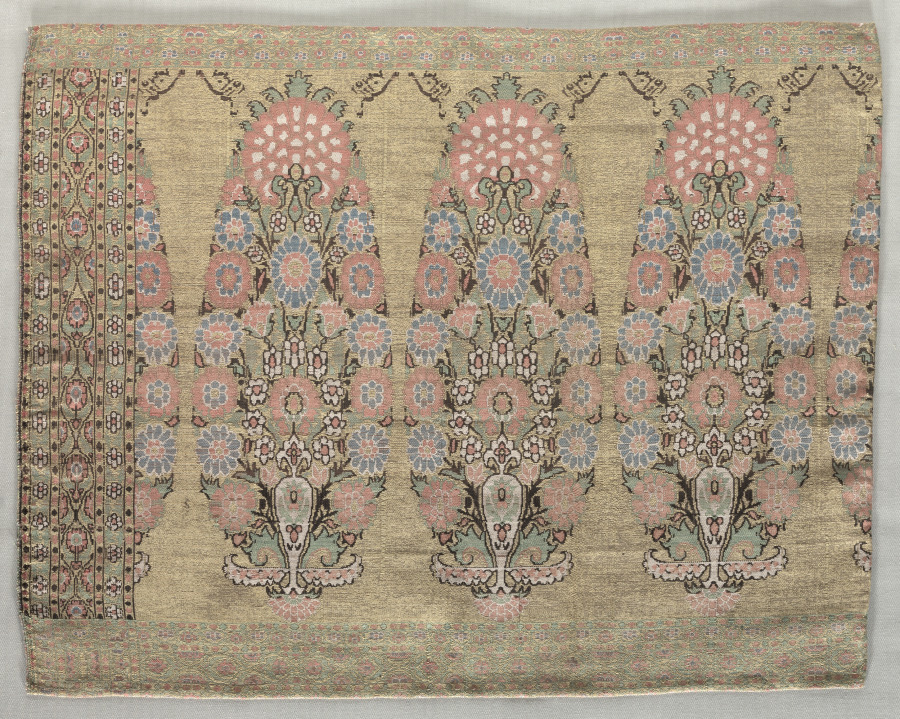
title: Two Pieces from a Scarf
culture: Iran, 18th century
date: 1700s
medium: brocade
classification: Textile